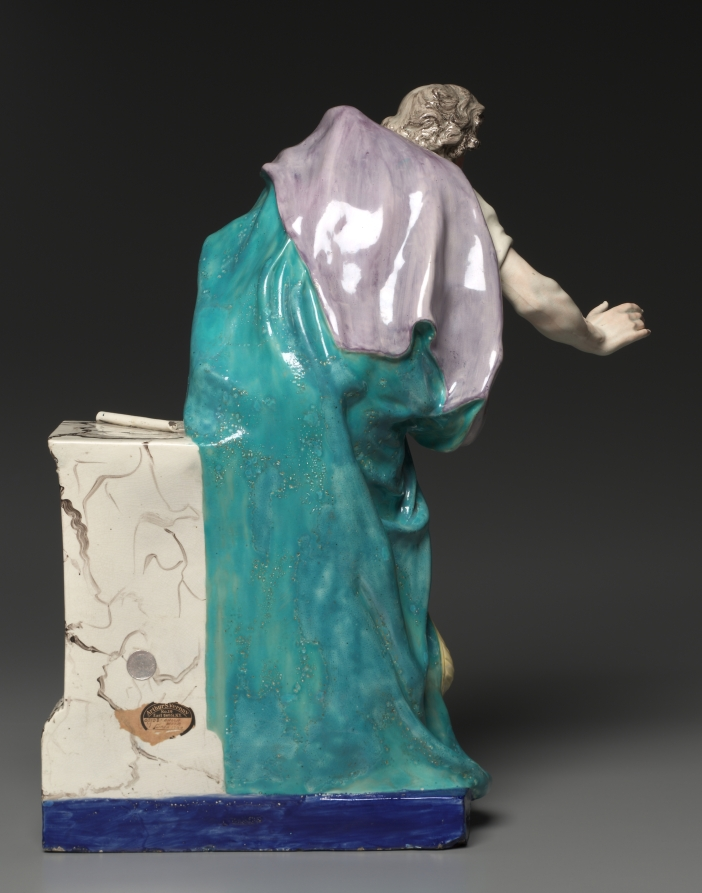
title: Figure of Demosthenes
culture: England, Staffordshire, Burslem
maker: Enoch Wood (British, 1759–1840)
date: c. 1800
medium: lead glazed earthenware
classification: Ceramic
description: Ceramic figures often depicted literary or mythological characters as a means of representing knowledge and intellectual refinement. As a result, they became an integral part of the decoration of most middle-class or wealthy houses in the 1700s and early 1800s. This figure depicts the Athenian orator Demosthenes (384–322 BC) delivering one of his philosophical lectures. The adjacent plinth reinforces his identity with a small image of a man lecturing the sea, something Demosthenes was known to do, while Hermes, the Greek god of eloquence, hovers above.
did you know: In Victorian times, this figure was thought to depict St. Paul preaching in Athens, but it actually portrays the Greek orator Demosthenes delivering one of his philosophical lectures.